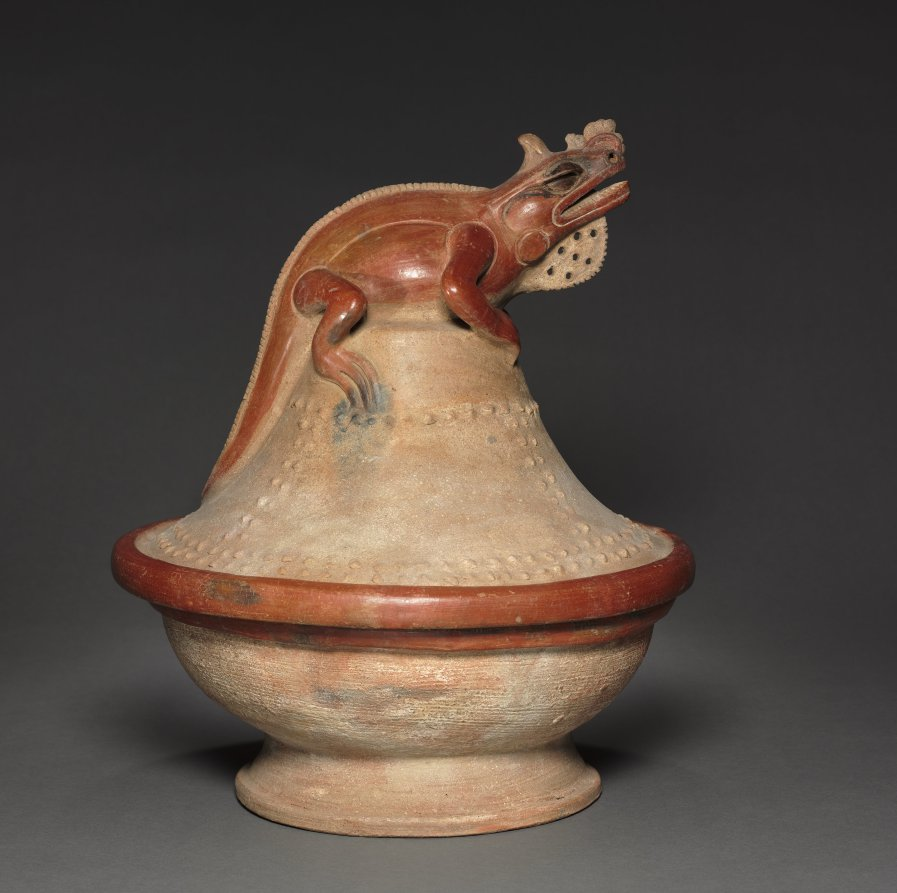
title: Lidded Bowl with Iguana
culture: Costa Rica, Southern Nicoya region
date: c. 600–1100 (Thermoluminescence date, 995–1395)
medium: ceramic, slip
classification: Ceramic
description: At the time of the Spanish conquest in the 16th century, Costa Rican mythology linked iguanas to the sky and to rulers. The earlier makers of this vessel left no written records, but they may have had similar beliefs. The lizard poses as though basking in the sun, a celestial body, and assumes an aggressive stance that could be likened to a ruler's: the teeth and chin under the dewlap are displayed, Also, fine ceramics like this were buried in the graves of the high-status dead, some of them certainly leaders of the several groups that competed in the area.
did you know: Green iguanas can grow to be over 6 feet long.